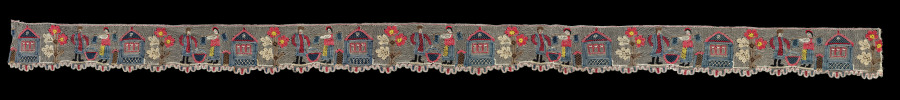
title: Figurative Border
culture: Russia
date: c. 1800–1899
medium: part (non-continuous) bobbin lace (tape lace)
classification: Lace